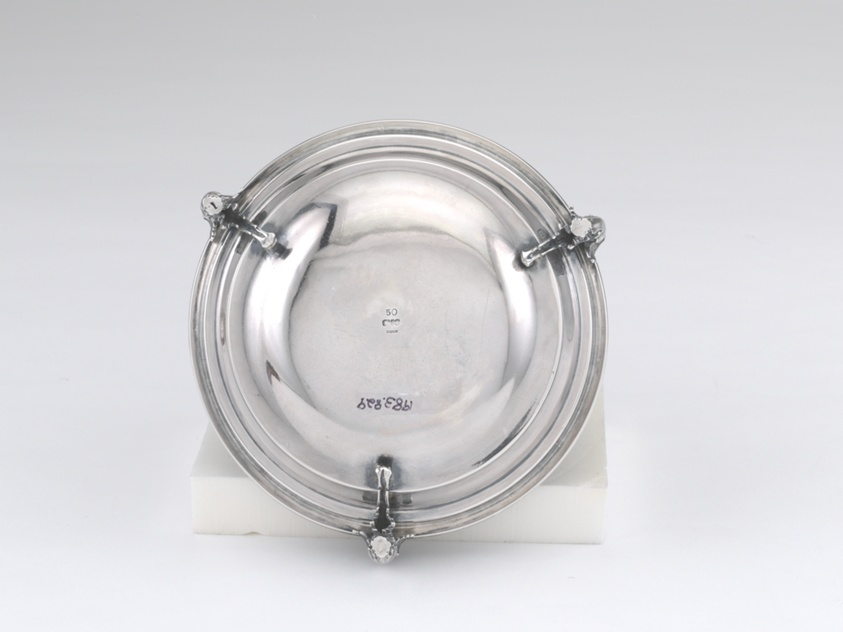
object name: Metalwork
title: Butter Dish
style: 19th century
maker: Gorham Manufacturing Company (American, founded 1831); Providence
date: 1853–65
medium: Silver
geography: Providence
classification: vessel for serving food; dish (vessel); silver; american decorative arts; american arts; decorative arts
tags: butter dish, birds, flowers, eagles, dining, eating